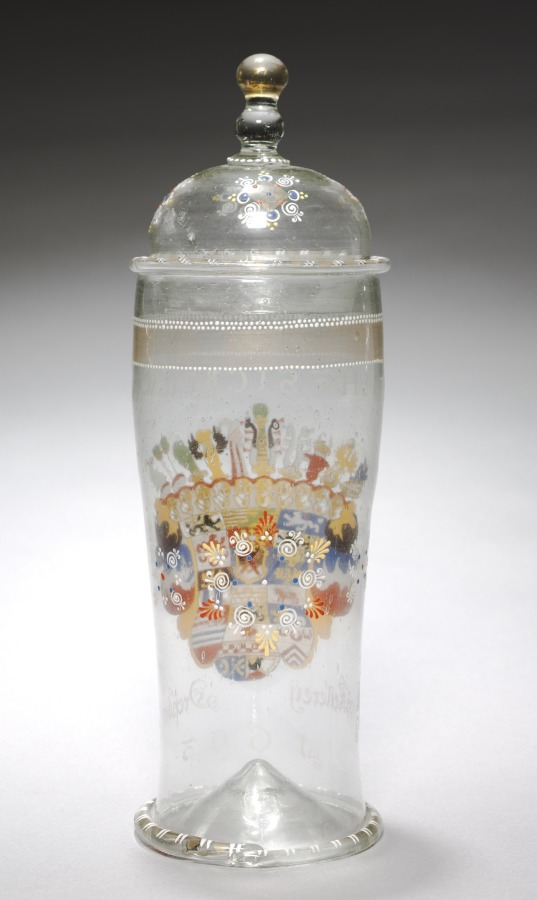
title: Covered Beaker (Humpen)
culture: Germany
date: 1693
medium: enameled glass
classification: Glass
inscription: I[ohann] G[eorg] D[er] 4 H[erzog] z[u] s[achsen] I[ulich] c[leve] B[erg] E[ngern] U[nd] W[estphalia] c[hurfürst]. Below the arms of the duke, in white enamel is the inscription: HOFFKELLEREY, DRESZDEN.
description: This humpen was made for the court cellar (Hofkellerei), Dresden, which belonged to the House of Saxony, showing the arms of Johann IV zu Sachsen.